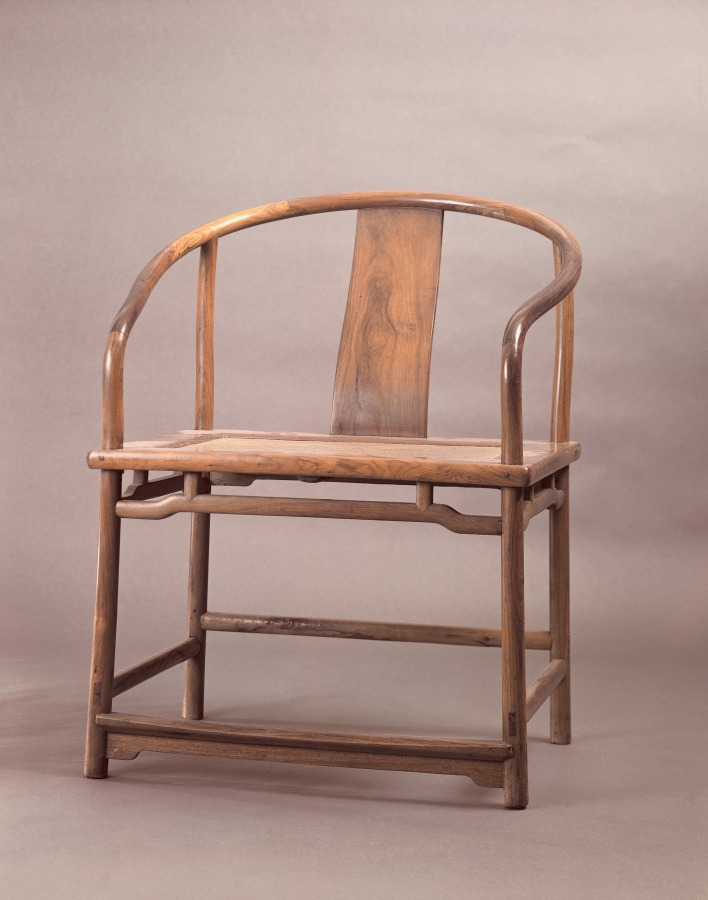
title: Pair of Roundback Armchairs: Lohan Type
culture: China, Ming dynasty (1368–1644) to Qing dynasty (1644–1911)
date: 1600–1700s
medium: Rosewood (huanghuali)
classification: Furniture and woodwork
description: In history, China moved from an original floor culture to high chairs and tables, developing a unique tradition of craftsmanship. Although still relatively unexplored, the manufacturing and styles of furniture differ by region. These horseshoe-back armchairs were made in Jiangsu province. Their simplicity and minimalist elegance are characteristic of Suzhou-style furniture and aesthetics. The backs of the chairs are made of seven pieces of wood, joined and secured with an inserted wooden pin, a mortise-tenon technique that appeared in its earliest form in Neolitihic fragments of the Hemudu culture.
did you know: The existence of such chairs in pairs suggests that they were used in more formal settings reserved for important guests and family members of age and high status.